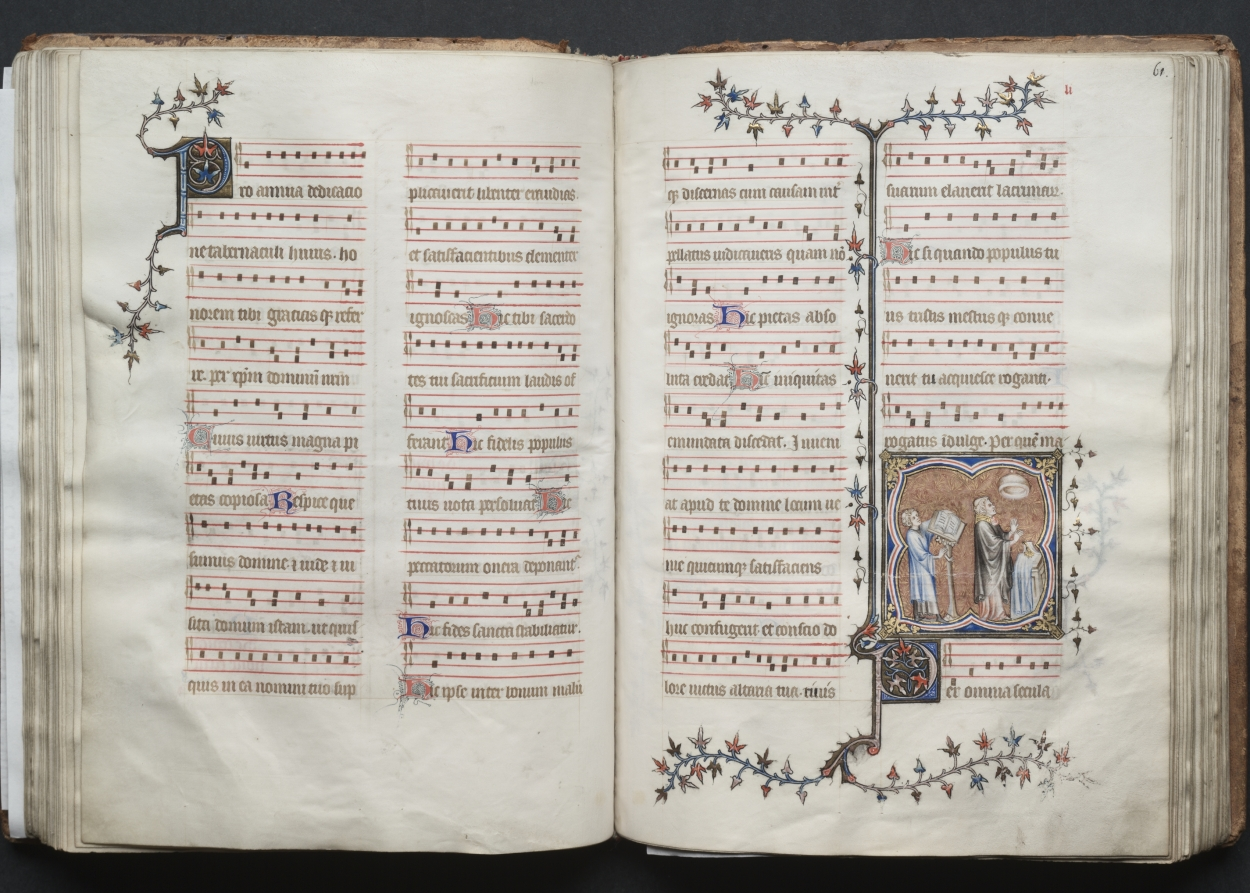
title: The Gotha Missal: Fol. 61r, A Priest Singing the Office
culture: France, Paris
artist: Master of the Boqueteaux (French)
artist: and Workshop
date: c. 1375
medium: ink, tempera, and gold on vellum; blind-tooled leather binding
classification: Bound Volume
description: The style and quality of this manuscript's decoration is typical of deluxe Parisian books made for aristocratic or royal patrons. Most of the book's decoration appears to be the work of the Master of the Boqueteaux, an artist active at the court of King Charles V (died 1380). His style was apparently shared by a number of book illuminators working in and around Paris. It is very possible that the Gotha Missal belonged to Charles V, but is not provable because the manuscript has no royal portraits and lacks a colophon. Given the book's magnificent decoration, however, it would seem that it was produced for a Valois prince, if not for the king himself. The manuscript receives its name from the German dukes of Gotha, its later owners.